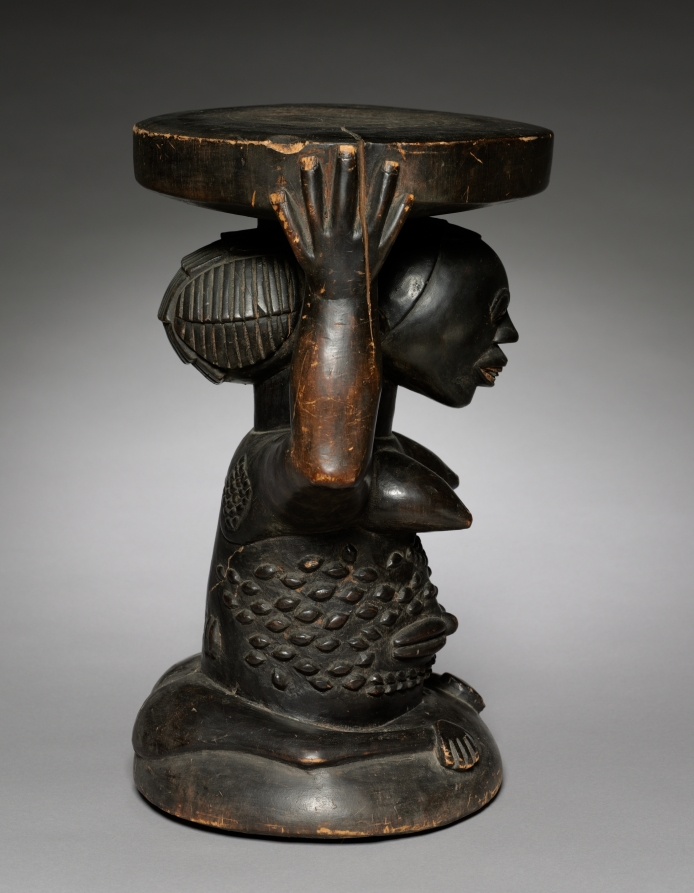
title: Caryatid Stool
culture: Africa, Central Africa, Democratic Republic of Congo, Luba-style carver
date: c. 1900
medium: wood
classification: Furniture and woodwork